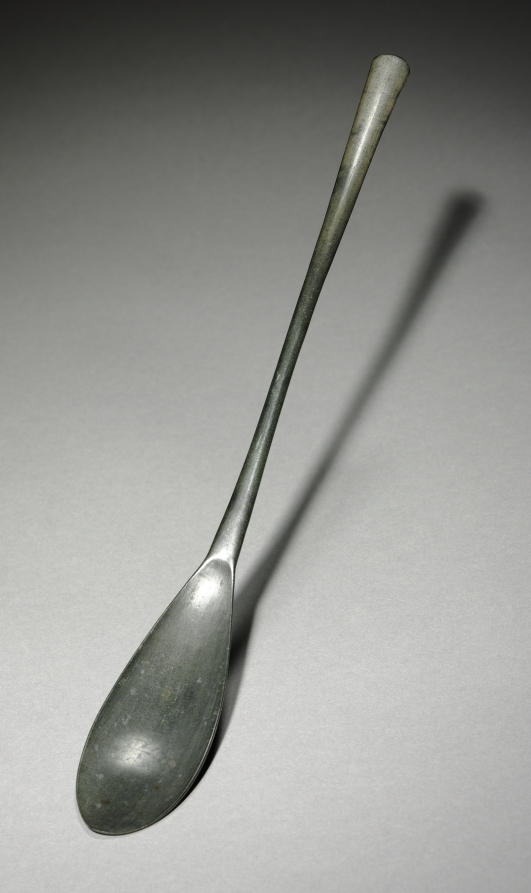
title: Spoon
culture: Korea, Goryeo dynasty (918–1392)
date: 918–1392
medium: silver bronze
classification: Metalwork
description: Celadons, spoons, seals, and bronze mirrors were the most common burial objects in tombs during the Goryeo period (918-1392). Furnishing tombs with an elaborate assemblage of objects was believed to honor and comfort the newly dead. Generally, Goryeo tombs were left untouched until the late 19th century. During the colonial period (1910–45), however, Japanese archaeologists hastily excavated the tombs located in Kaeseong, the former capital of the Goryeo dynasty. Scholars recently have proposed that toward the end of the 14th century, Koreans enjoyed meat-based soups more than any other dishes, explaining why many more spoons than chopsticks were buried in tombs.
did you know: Bronze spoons are the most common burial item. Scholars have proposed that toward the end of the 14th century, Koreans enjoyed meat-based soups more than any other dishes, explaining why spoons became common household items as well as burial goods.